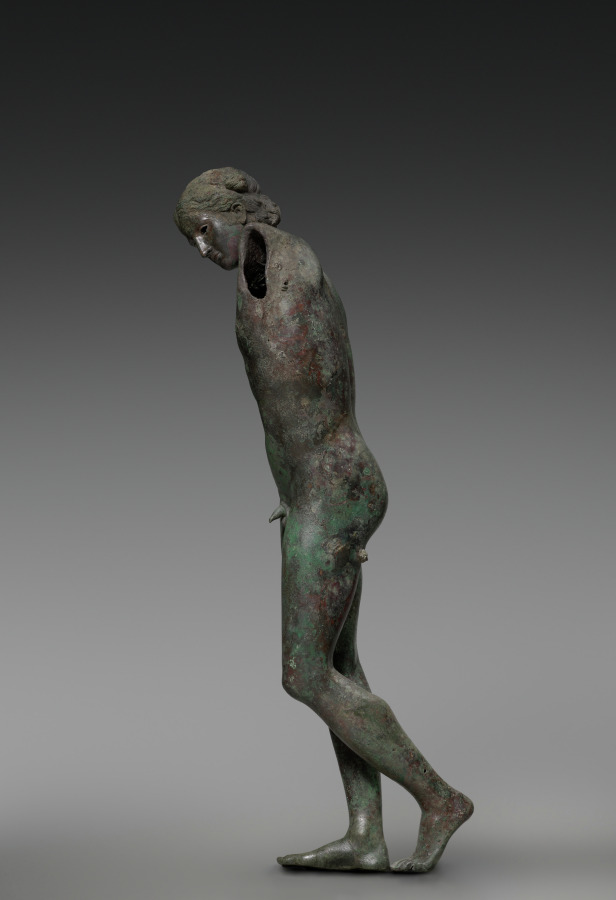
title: The Cleveland Apollo: Apollo Sauroktonos (Lizard-Slayer) or Apollo the Python-Slayer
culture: Greece, Athens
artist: attributed to Praxiteles (Greek, Athenian, c. 400–330 BCE)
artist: or Follower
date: c. 350–200 BCE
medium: bronze, copper and stone inlay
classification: Sculpture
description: The Cleveland Apollo was cast in multiple sections using the indirect lost-wax technique. First, molds were taken from a working model (now no longer known or preserved), which was then reproduced in hollow wax sections, each filled with a clay core. After details were added to the wax models, each was encased in clay. Then, the wax was heated, melted out, and replaced by molten bronze. Once cooled, the hollow bronze sections were fused together and finished, patching flaws and adding inlays and other details. Since the initial model was retained, it could be reused, allowing ancient sculptors to create multiples and variations of favorite works. Thus, remarkably, the Cleveland Apollo may once have been one of several such works. The consistently thin walls of the Cleveland Apollo (mostly 5-6 mm thick), together with the nearly invisible joins between most cast sections, show that it was created by highly skilled sculptors and foundry workers. Close looking reveals several noteworthy features. First, ovals atop the right foot mark a fusion weld, where molten bronze pooled to join separately cast sections. Second, small rectangular bronze patches cover parts of the surface (especially the right hip), each carefully cut and then hammered into place over holes or other casting defects. Inlaid lips, nipples, and eyes (the right ancient stone, the left now a modern replacement) added to the lifelike appearance of the sculpture, contrasting with the once bronze-colored skin. Finally, radiography helps to illuminate hidden features, such as the cast edge of the neck of Apollo.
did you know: Ovals across the top of the right foot show a clear join between separately cast sections.